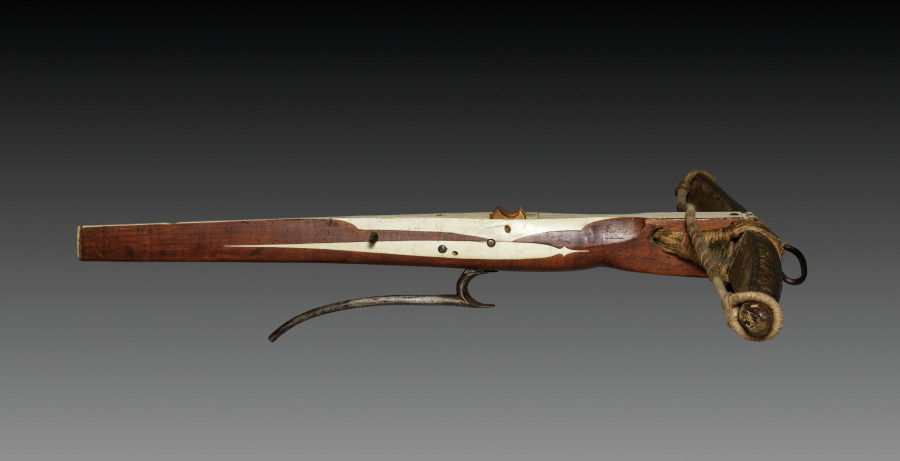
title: Crossbow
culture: Germany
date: c. 1460–70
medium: wood (walnut?) inlaid with bone; horn; iron and steel; composite bow (horn and parchment)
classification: Arms and Armor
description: The cranequin, or winding device sitting on top of the crossbow, made it easier to span for reloading. With a full quiver, a container for bolts and arrows, a hunter could bring home plenty of meat.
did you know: In every army in Europe crossbowmen were considered an elite corps, and as such occupied the central position in battle formations.